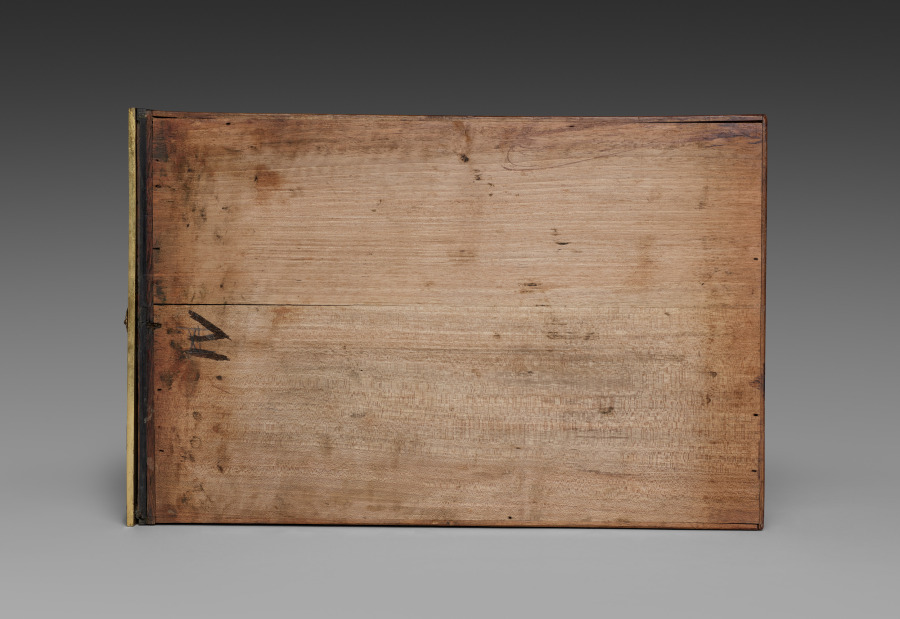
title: Side Drawer for Cabinet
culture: France, late 17th Century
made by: André-Charles Boulle (French, 1642–1732)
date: c. 1690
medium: ebony, marquetry in metal and tortoise shell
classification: Furniture and woodwork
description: Appointed cabinetmaker to King Louis XIV in 1672, André-Charles Boulle became a master of furniture making in France during the late 1600s until his death in 1732. Known primarily for his use of marquetry, in which metal patterns are inlaid into tortoiseshell then applied within the veneered surface of the furniture, Boulle established a level of quality and craftsmanship few others could achieve. As a result, his work found favor at the royal court and among other aristocrats and diplomats eager to impress the king. The inclusion of a medallion depicting Louis XIV within the bronze decoration of this chest would have identified the owner with the royal court. Often exhibiting stout architectural proportions with elegant groups of inlaid motifs such as the parrot on the central panel of this chest, Boulle’s designs are an example of the intellectual fashion for contrasting ideas, materials, and motifs.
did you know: Originally designed to sit atop an elaborate tall stand, this chest was likely altered in the late 1700s to reduce its scale and height.